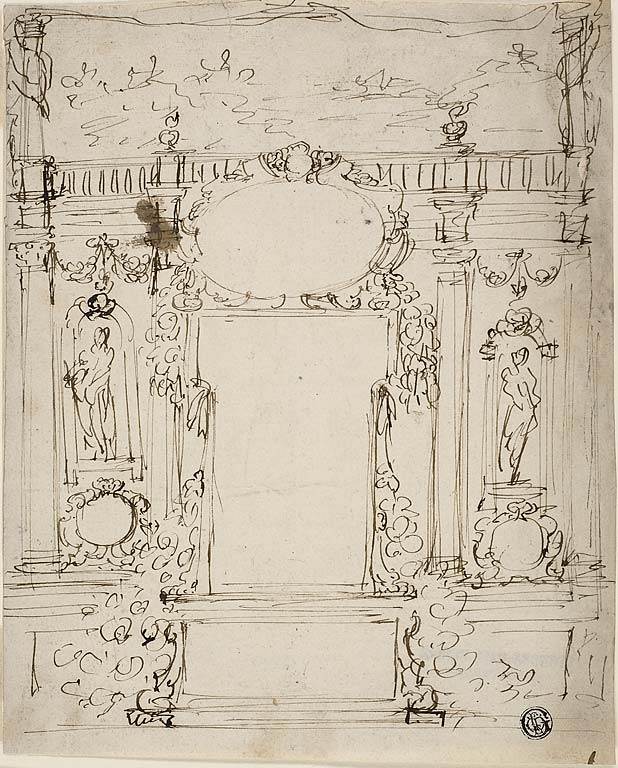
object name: Drawing and Watercolor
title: Mirror with Cartouche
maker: Unknown Artist; Italian, 1600-1699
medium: Pen and brown ink on ivory laid paper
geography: Italy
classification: pen and ink drawings; drawings (visual works); prints and drawing